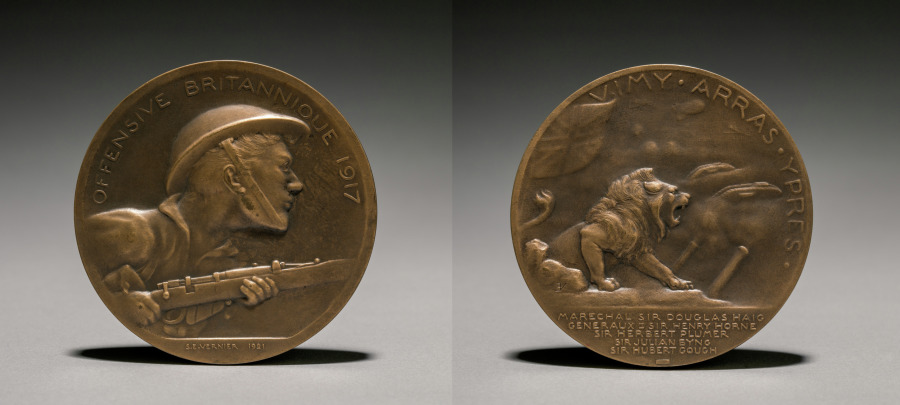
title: Medal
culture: France, early 20th century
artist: Èmile Séraphin Vernier (French, 1852–1927)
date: 1921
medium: bronze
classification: Metalwork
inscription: obverse - "Offensive Brittanique 1917"; signed: "S. E. Vernier, 1921." reverse - "Vimy, Arras, Ypres, Marechal Sir Douglas Haig, Generaux Sir Henry Horne, Sir Herbert Plumer, Sir Julian Byng, Sir Hubert Gough."